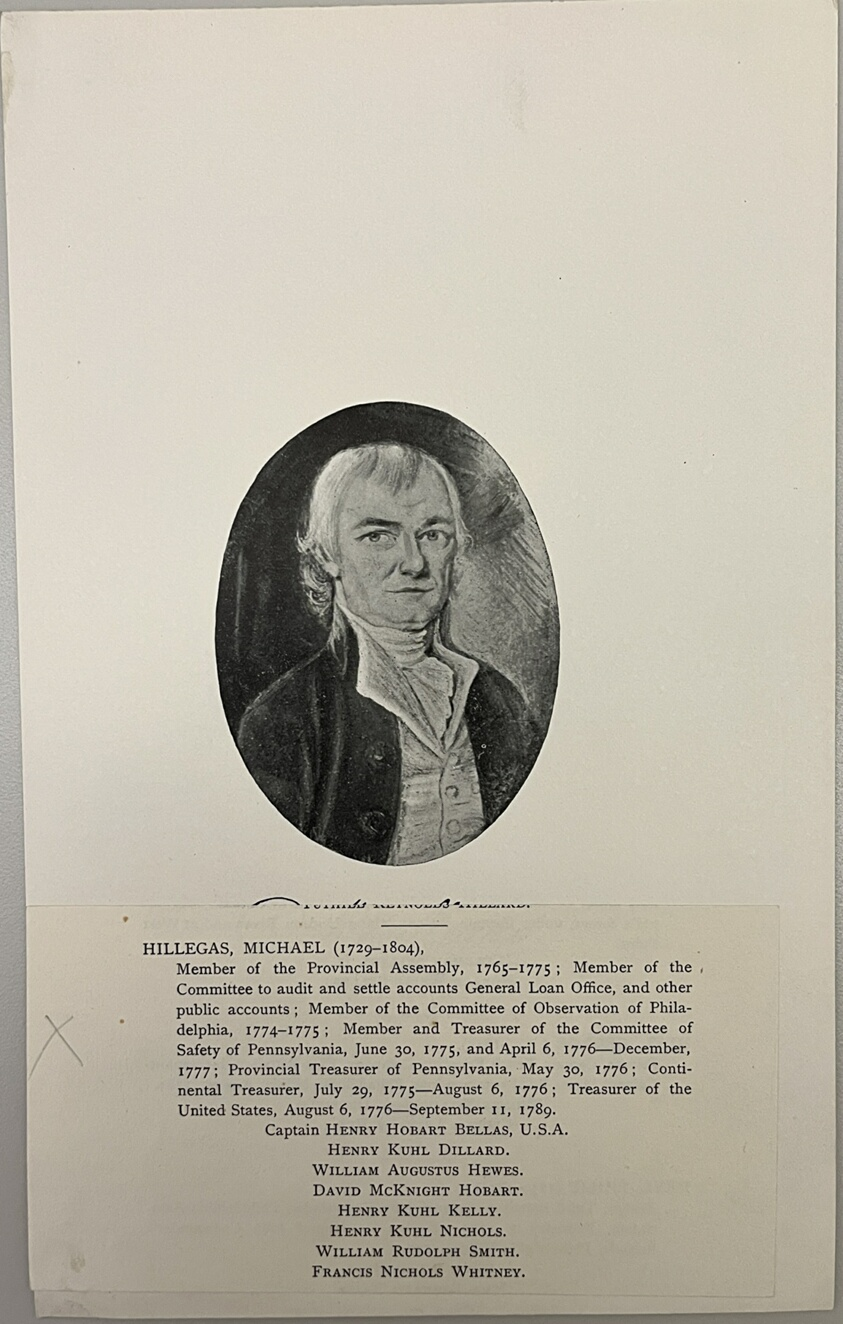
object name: Print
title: Michael Hillegas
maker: Artist Unknown (Likely American or British, 19th century)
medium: Lithograph on paper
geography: United States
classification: reproduction; print; prints and drawing